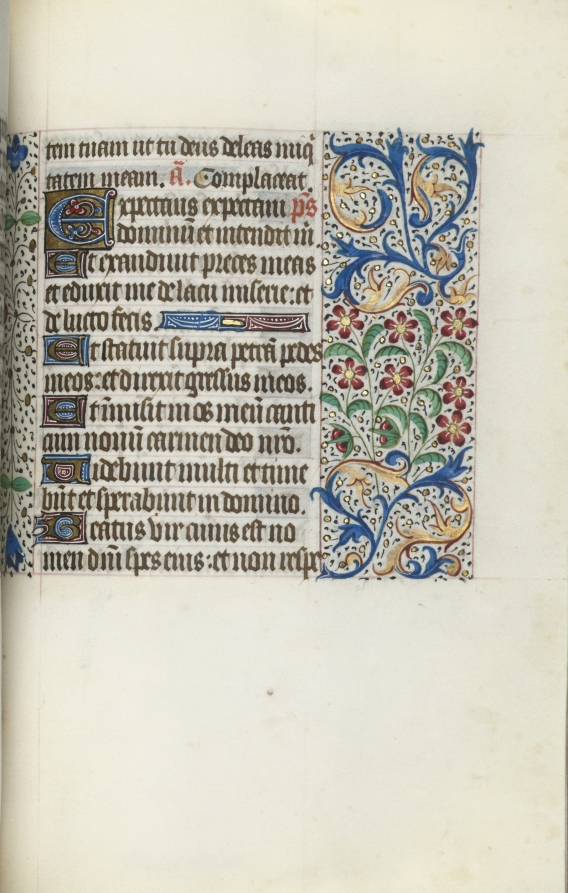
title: Book of Hours (Use of Rouen): fol. 125r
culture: France, Rouen, 15th century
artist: Master of the Geneva Latini (French, active Rouen, 1460–80)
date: c. 1470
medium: ink, tempera, and gold on vellum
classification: Bound Volume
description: In the late 1400s and early 1500s Rouen was an established and important center of book production. The city’s cathedral had a wealthy chapter that spent large sums of money to commission books and to maintain its extensive library. The stationers and booksellers would have likely been concentrated in or near the cathedral precinct. This artist, named after a manuscript now in Geneva, was Rouen’s principal illuminator during the second half of the 1400s.